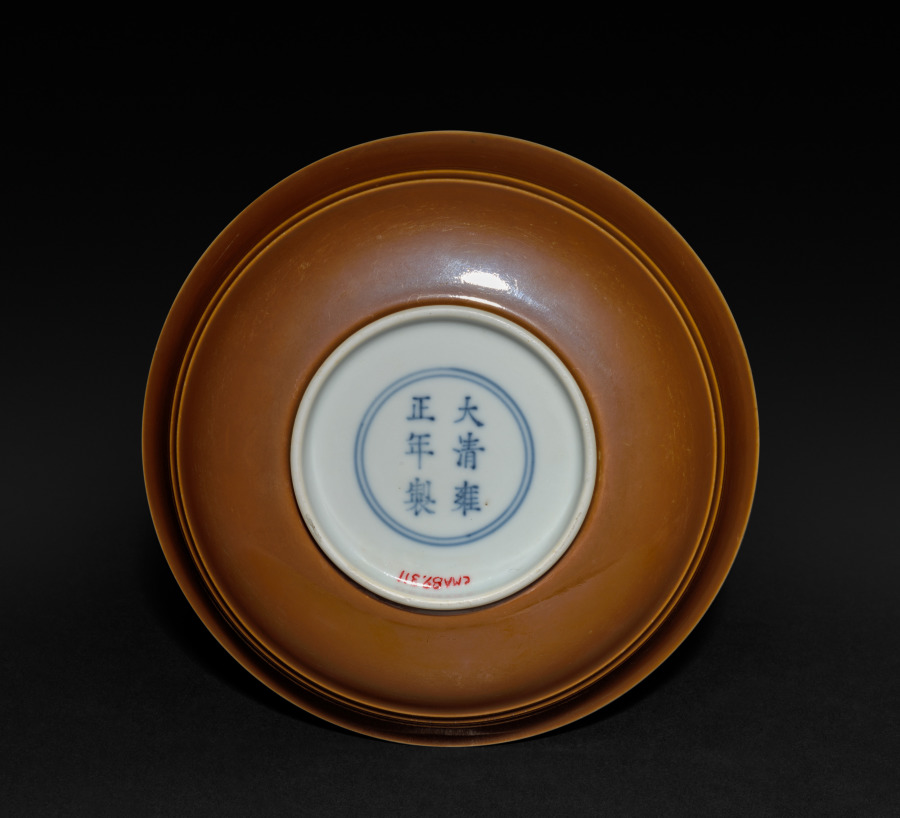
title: Dish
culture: China, Jiangxi province, Jingdezhen kilns, Qing dynasty (1644-1911), Yongzheng mark and reign (1723-35)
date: 1723–35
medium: porcelain with café-au-lait glaze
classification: Ceramic